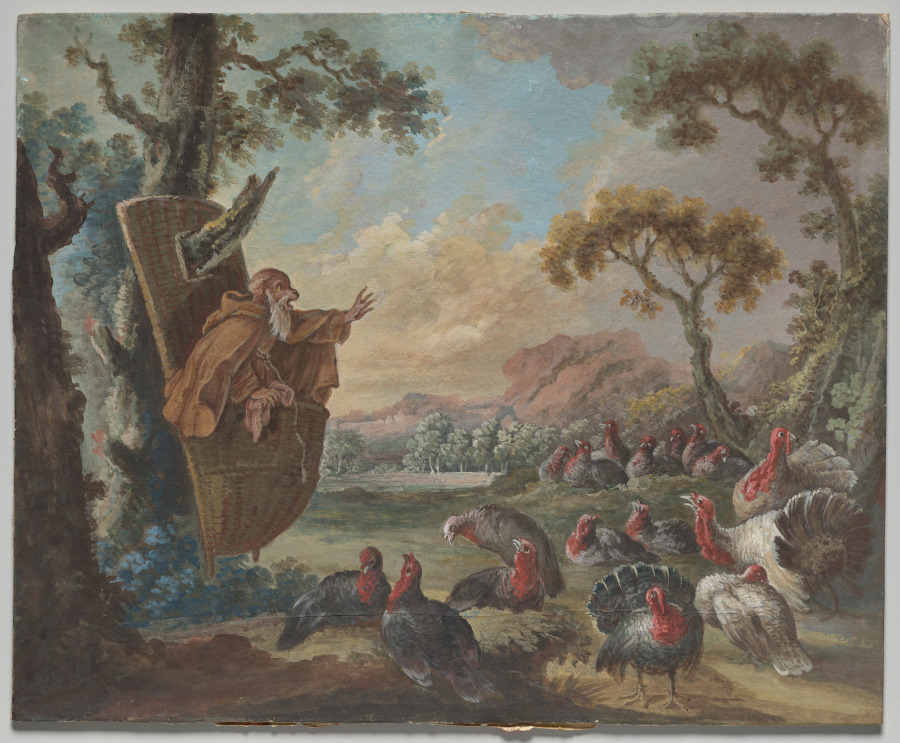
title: Monkey Preaching to Turkeys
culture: France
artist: circle of Christophe Huet (French, 1700–1759)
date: 1750–1800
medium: Gouache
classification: Drawing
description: This work belongs to a genre of imagery called singerie, which depicts monkeys dressed in human clothes parodying the actions of people. Here, a monkey preaches to a flock of turkeys from a wicker basket pulpit hanging from a tree. The turkeys, interpreted as symbols of foolishness, are deceived by the cunning primate in the disguise of a monk’s habit.